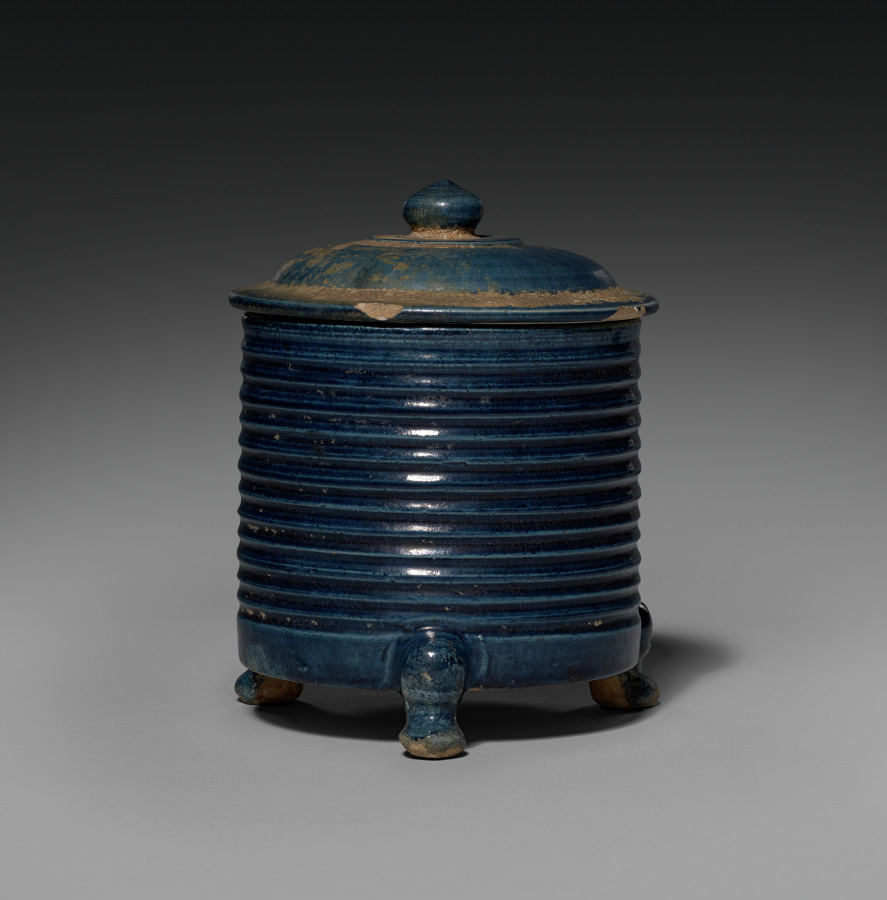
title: Covered Jar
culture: China, Tang dynasty (618–907)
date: early 700s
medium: glazed earthenware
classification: Ceramic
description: This covered cylindrical jar with three animal feet is lavishly covered with a cobalt blue glaze in the exterior and an amber glaze in the interior. Of the colored lead glazes of sancai (three-color) ware, blue was preeminent and precious. Imported cobalt from Persia (Iran, Afghanistan) was used as a glaze colorant that yields a rich, brilliant blue of considerable splendor.